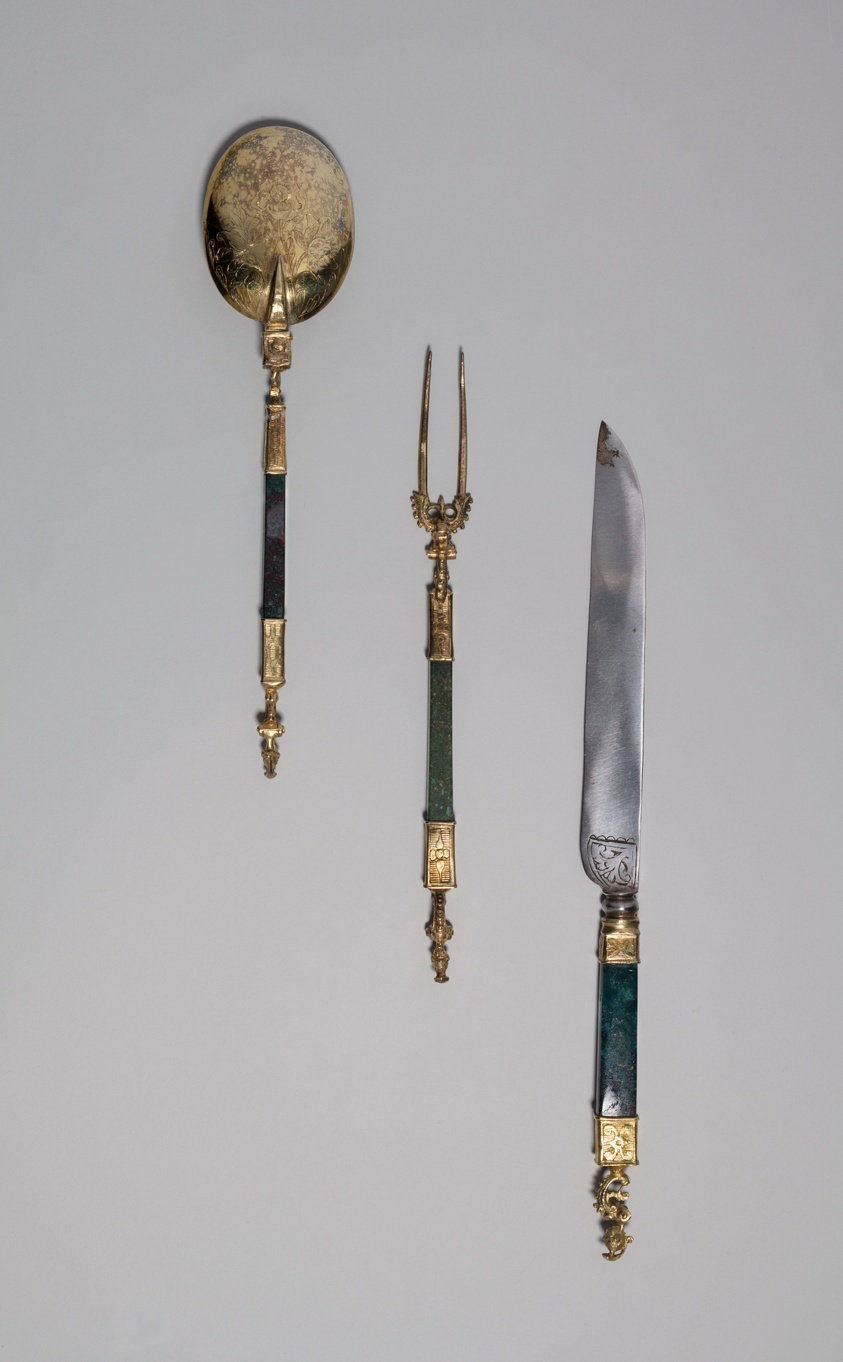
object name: Metalwork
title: Fork, Knife, and Spoon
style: Mannerism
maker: Southern Germany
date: c. 1600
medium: Bloodstone (Heliotrope), silver, gilding, and steel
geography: Southern Germany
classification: cutlery; spoon; decorative arts; metalwork; fork (flatware); knife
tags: dining, dinnerwear, Germany, goddesses, helmets, minerva